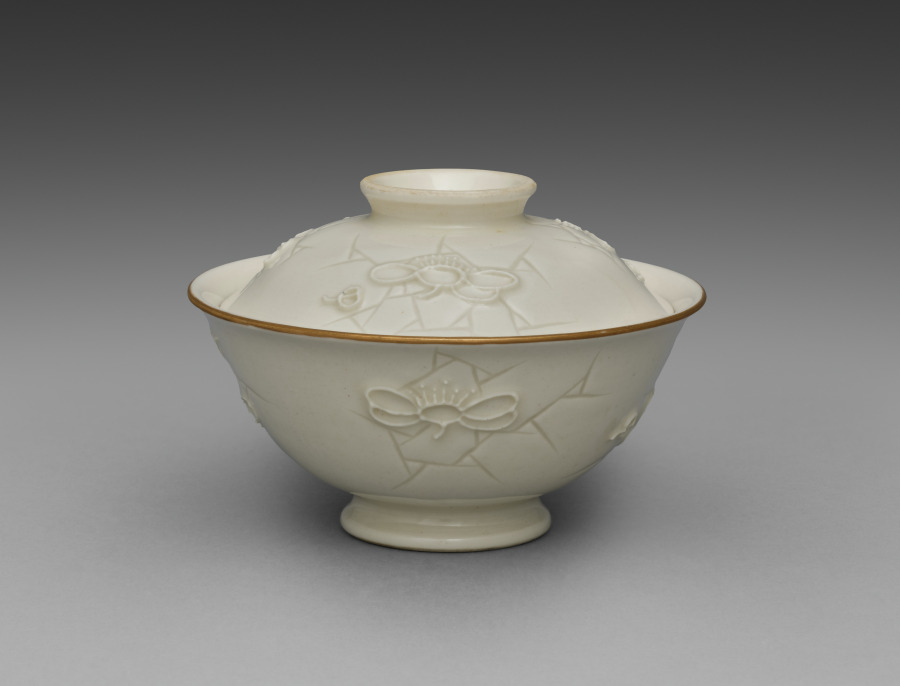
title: Covered Bowl from Dining Set with Plum Blossoms and Cracked-Ice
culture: Japan, Meiji period (1868–1912)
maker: Seifū Yohei II (Japanese, 1844–1878)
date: c. 1875–78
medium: Porcelain with molded designs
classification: Ceramic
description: Each item in this set has a delicate low-relief design of flowering plum branches over scattered, intersecting lines meant to resemble the cracked-ice surface of a frozen body of water and is signed on the base in gold pigment. While Yohei II produced many fine works in underglaze blue, like those produced by Kiyomizu Shichibei, he also made works in quite different styles later in his career, from the early 1870 s. In 1873, he was appointed purveyor to the Industrial Center of Kyoto Prefecture, a designation associated with Kyoto’s efforts to reach an international market through the port of Kobe; and from 1875 until his death, he was involved in national-level projects to present Japanese ceramics across the world. It was during this period that Yohei III was apprenticed to Yohei II, and it has been suggested that this set may in fact be an early example of Yohei III’s work, which he signed with his teacher’s name. Decorated with flowers resembling Japanese textile motifs, the set calls to mind the design of Yohei II’s pair of vases with plum blossoms in the Victoria and Albert Museum. Here, the elaborate trees created for a formal public exhibition setting have been translated into the approachable blossoms of the genteel domestic environment. While the designs are consistent across the pieces, each raised flower petal and pistil and each incised line in the ice was done by hand, so the cups, bowls, and dishes are similar yet unique. The bottoms of two boxes once identified the set’s owner, but the information has been deliberately obscured with black ink. However, inscriptions still visible appear to indicate two occasions, once at the end of July 1886 , and once again in June 1916 , when parts of the set were requested from Hokura in Niigata Prefecture. The location corresponds to a neighborhood in the present-day city of Jōetsu. The surname Tsuji 辻 also appears on a paper tag affixed to one of the box cloths. Future research may possibly reveal more about their provenance. A vase by Yohei III in a private collection combines the formal grandeur of the Yohei II vases in the Victoria and Albert Museum with the gentler design of this dining set, placing flowering plum trees against soft, scalloped-edge clouds resembling those in golden screens.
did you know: The dining wares have a creamy white coloration that the four boxes containing them identify as Korean in style.